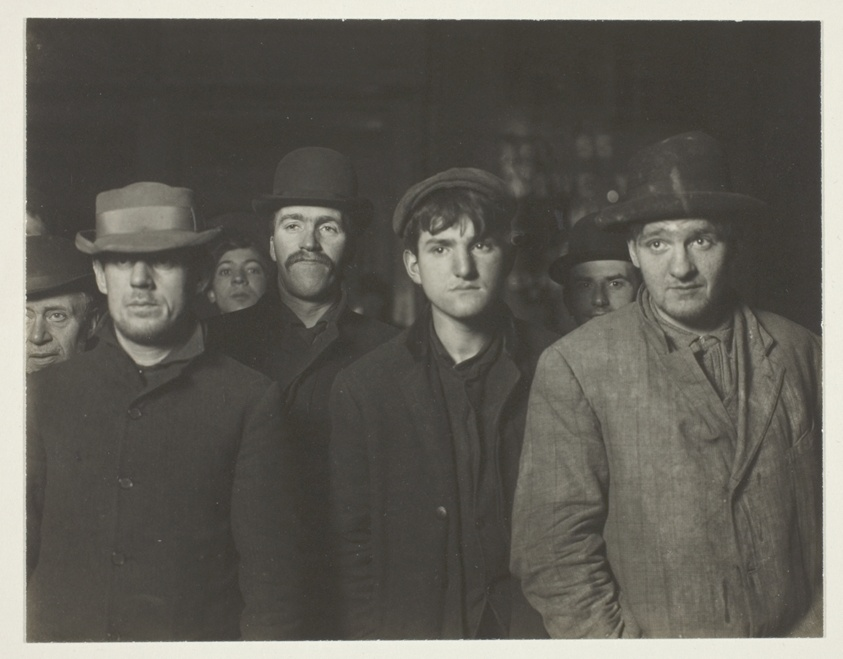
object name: Photograph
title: Untitled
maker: Lewis Wickes Hine (American, 1874–1940)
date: c. 1915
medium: Gelatin silver print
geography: United States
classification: gelatin silver (developing-out-paper) pr; photographic process; photography; photograph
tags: Collected by Hugh Edwards